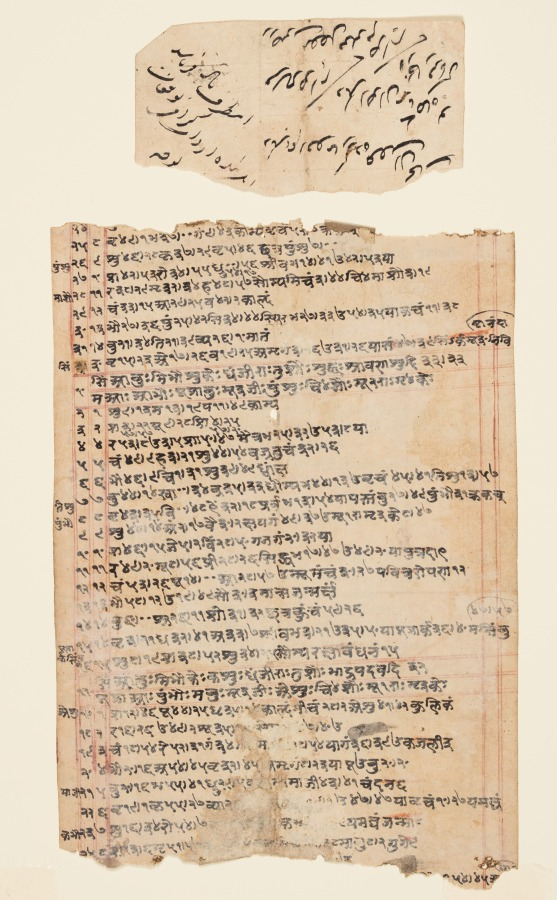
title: Stone sculptures in a Shiva temple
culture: Northern India, Pahari kingdoms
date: c. 1710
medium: gum tempera and ink on paper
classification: Painting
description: Viewers see a temple sanctum, the innermost and holiest part of a temple, from the point of view of the artist standing in front of the doorway. On a pedestal is a stone carving of the Hindu god Shiva on his mount, the bull Nandi. His wife, the goddess Parvati, sits on a lotus above his folded knee. The flowers, textiles, and devotional pigments are traces of ardent religious activity. At the right is an abstract cylindrical sculpture denoting the formless essence of Shiva, known as a linga. The tridents in front of the linga’s pedestal were placed by devotees whose wishes came true after visiting the temple.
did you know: An image of Ganesha can be seen on the left wall of the sanctum sanctorum.